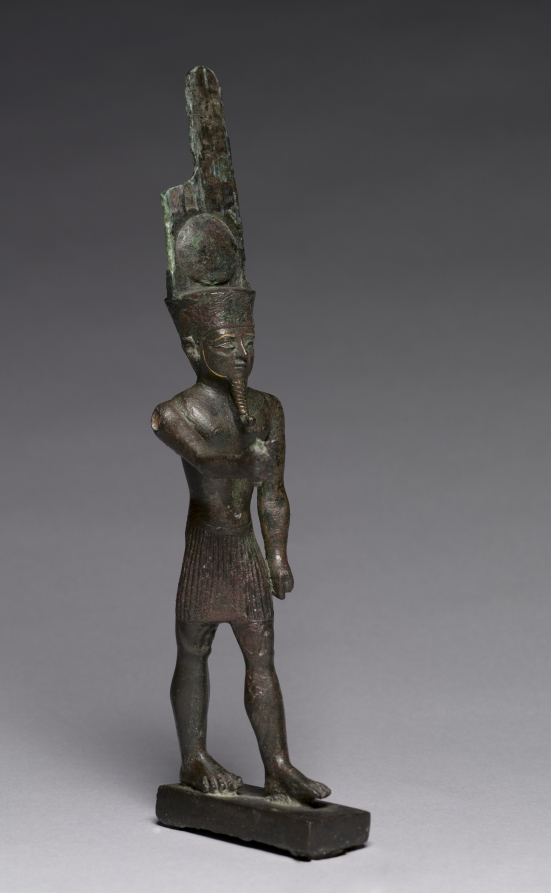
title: Statuette of Amen-Ra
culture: Egypt, Late period (715–332 BCE), Dynasty 26 or later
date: 664–30 BCE OR 664–330 BCE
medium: bronze, solid cast, inlaid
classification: Sculpture